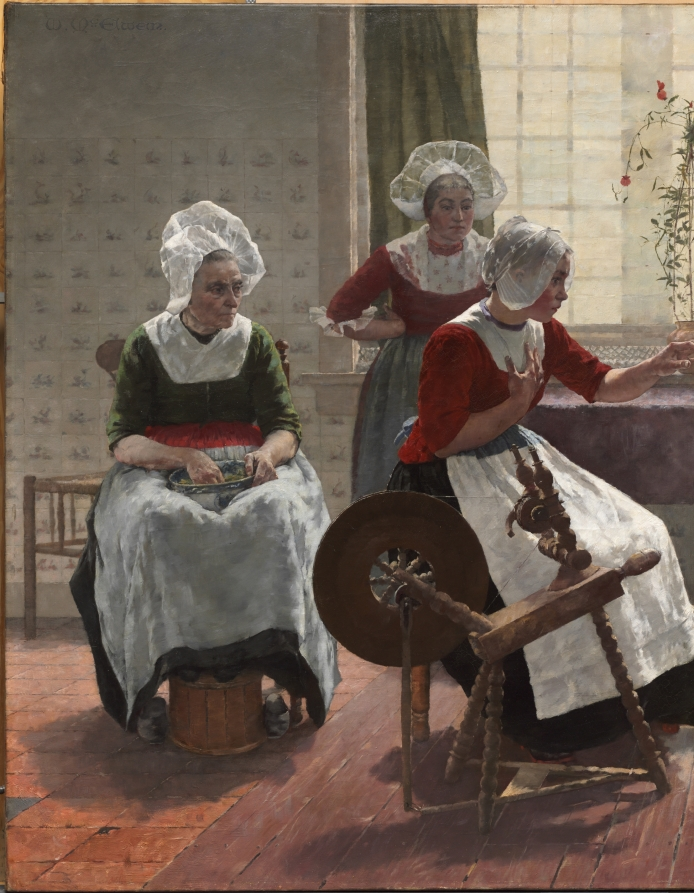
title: The Ghost Story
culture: America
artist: Walter MacEwen (American, 1860–1943)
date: 1887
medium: oil on canvas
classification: Painting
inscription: signed upper left: W. McEWEN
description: During the 1880s, the Netherlands became a magnet for several American artists, among them Walter MacEwen. His most famed painting, The Ghost Story, presents a group of individuals in a Dutch interior listening with rapt attention to spooky narration delivered by a woman at a spinning wheel. A young girl clutches her doll in fascination.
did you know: The women in this painting wear the traditional clothing of Volendam, a fishing village located in the province of North Holland.